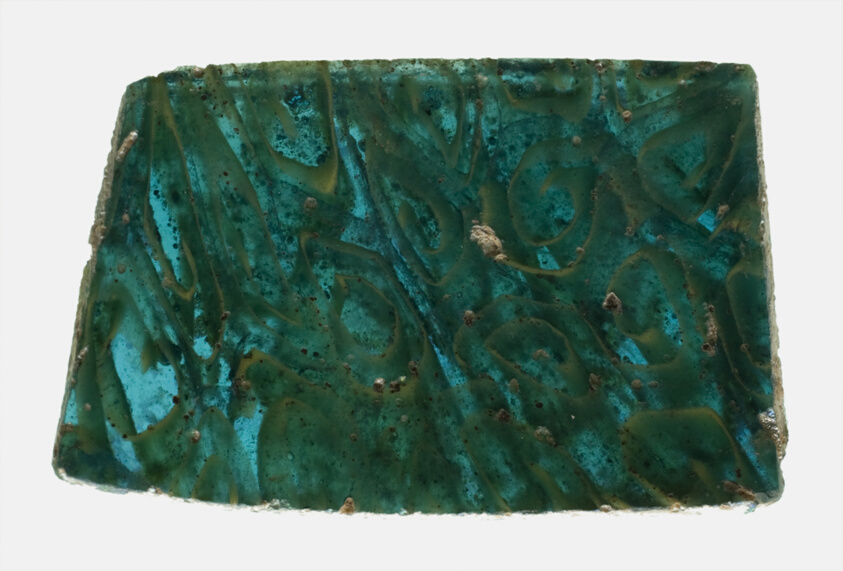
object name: Decorative Arts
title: Bowl Fragment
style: roman (ancient, style or period), ancient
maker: Roman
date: 1st century BCE-1st century CE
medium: Glass, mosaic glass technique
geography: Roman Empire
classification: fragment; bowl; decorative arts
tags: decoration